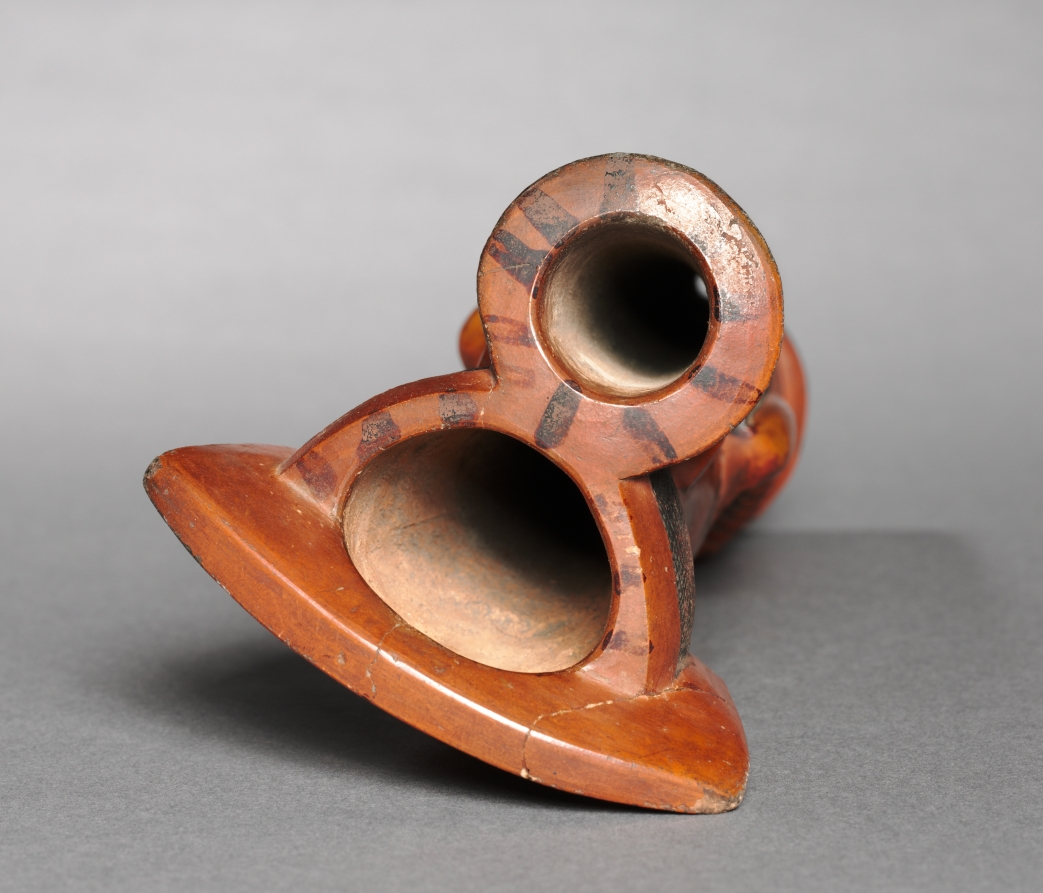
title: Pipe Bowl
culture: Equatorial Africa, Cameroon, Bali, 20th century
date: before 1935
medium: Ceramic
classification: Implements